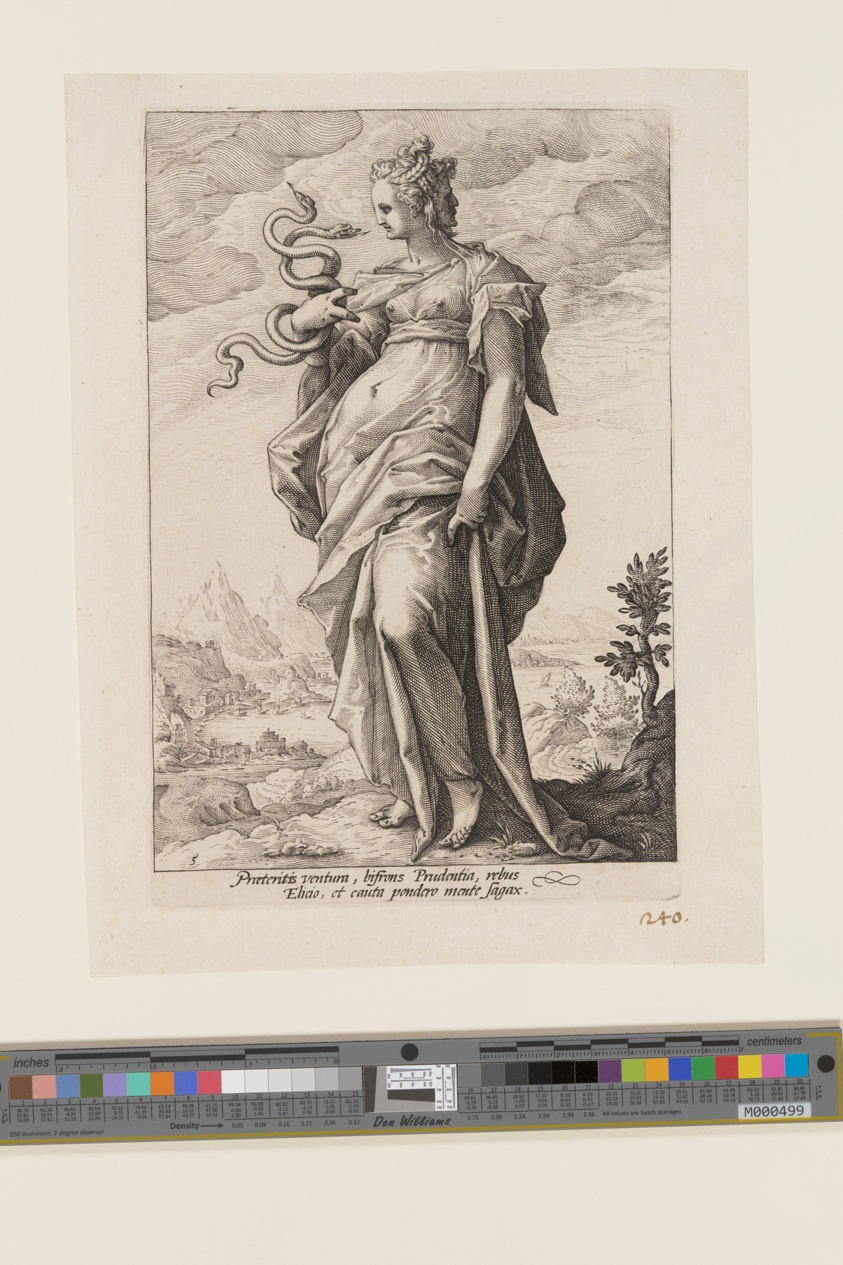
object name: Print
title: Prudence, from The Virtues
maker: Jacob Matham (Dutch, 1571–1631); after Hendrick Goltzius (Dutch, 1558–1617)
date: c. 1593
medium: Engraving on ivory laid paper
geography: Netherlands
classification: engraving; paper; print; prints and drawing